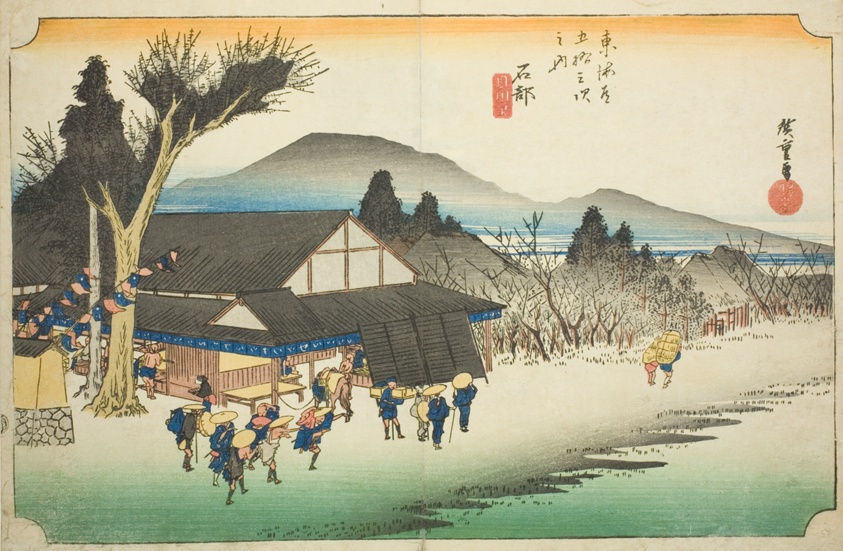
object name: Print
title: Ishibe: Megawa Village (Ishibe, Megawa no sato), from the series "Fifty-three Stations of the Tokaido (Tokaido gojusan tsugi no uchi)," also known as the Hoeido Tokaido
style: Japanese (culture or style)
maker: Utagawa Hiroshige 歌川 広重; Japanese, 1797-1858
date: c. 1833/34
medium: Color woodblock print; oban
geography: Japan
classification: woodblock print; print; asian art